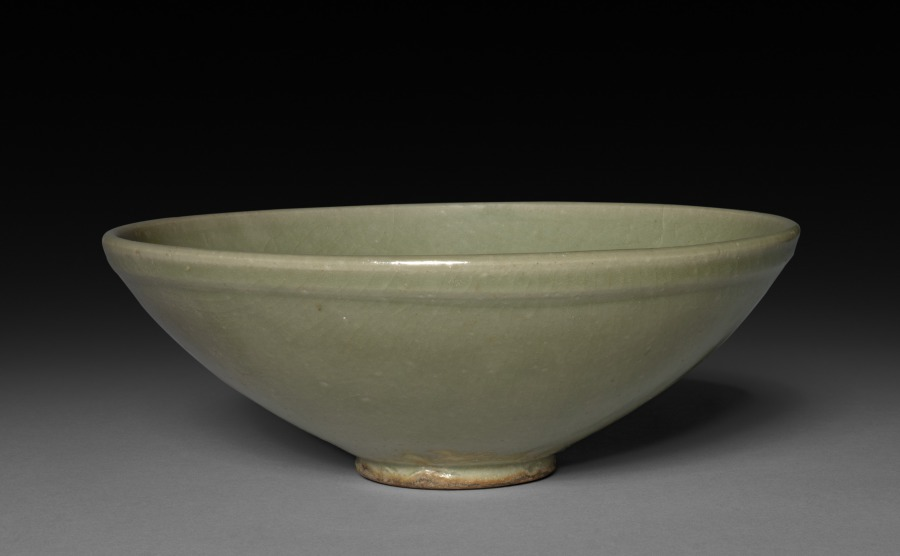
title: Bowl with carved floral decoration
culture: China, probably from the Yaozhou kilns, Shaanxi Province, Northern Song dynasty (960-1127)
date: 1100s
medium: Glazed porcelain, Northern Celadon ware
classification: Ceramic